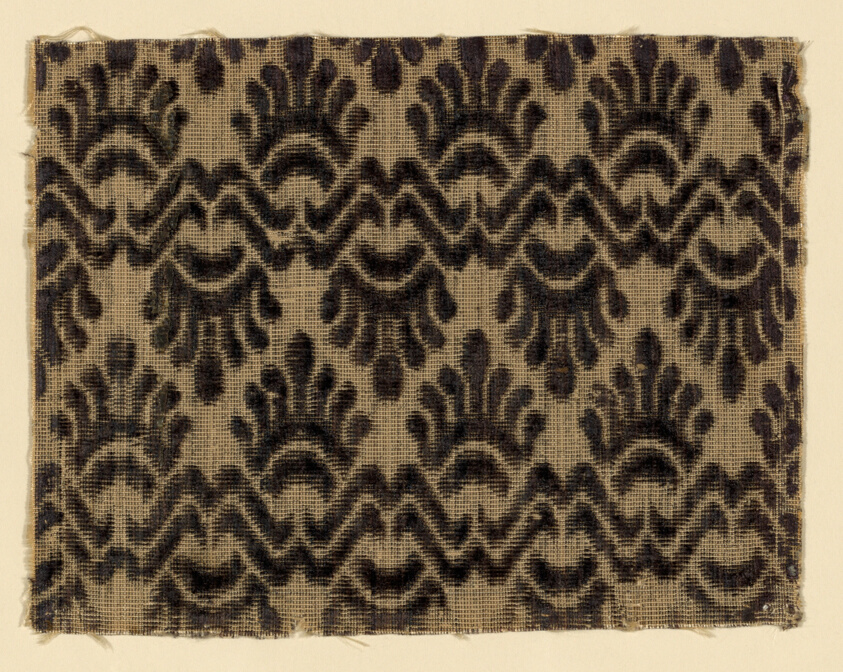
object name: Textile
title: Fragment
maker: Italy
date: 1601/50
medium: Silk and gold gilt strips; plain weave with supplementary patterning wefts and supplementary pile warps forming cut, uncut, and voided velvet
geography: Italy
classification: textile; weaving - velvet; weaving